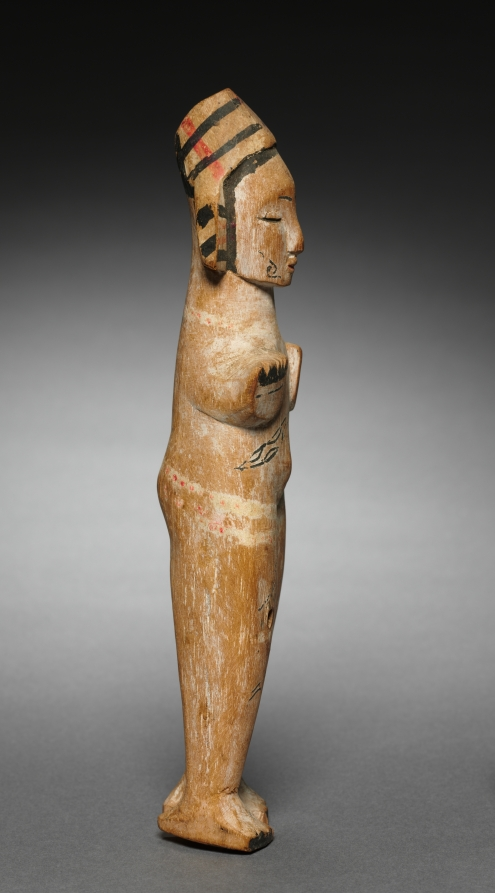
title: Doll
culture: Africa, West Africa, Nigeria, Ibibio style, unknown artist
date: 1900s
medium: Wood, kaolin, and paint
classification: Sculpture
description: Young Ibibio girls would play with dolls for fun. The dolls also took on deeper significance when a girl entered seclusion to go through preparations for adulthood and marriage, representing her future children and promoting her fertility. The kaolin (white clay) that once covered the figures' bodies has been worn off, possibly through handling during play. Thin lines represent uli, a kind of body painting. Upraised, foreshortened hands with open fingers were typical of dolls carved by Ibibio people from the Anang group.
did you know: Dolls like this were sold at markets where they were purchased as symbolic playthings for girls or souvenirs for tourists.